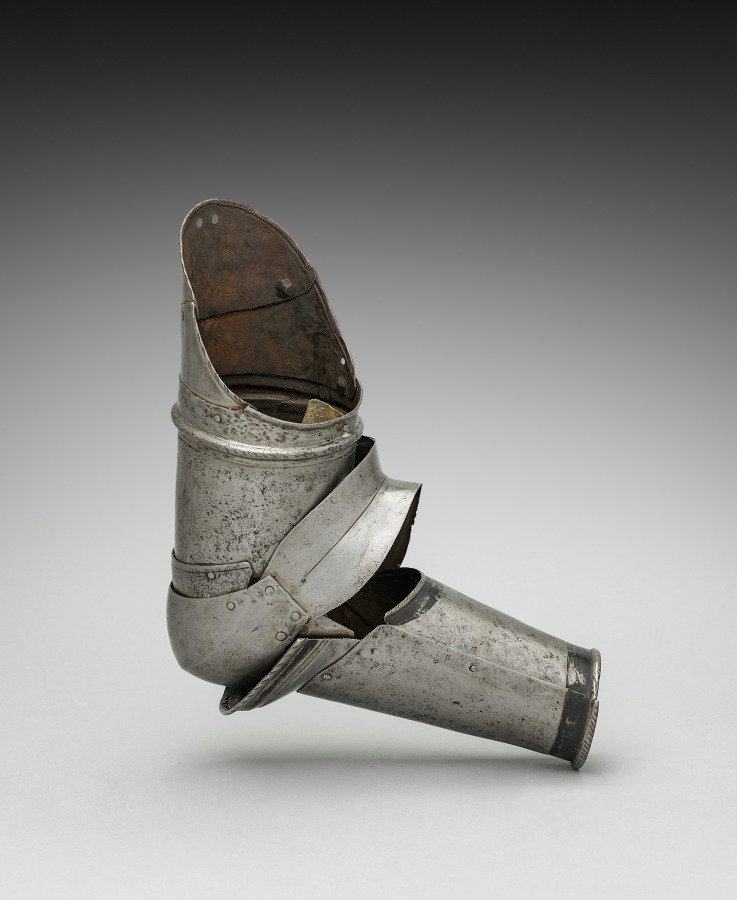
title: Left Vambrace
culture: Germany, 19th century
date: 1801–1900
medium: steel with black paint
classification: Arms and Armor